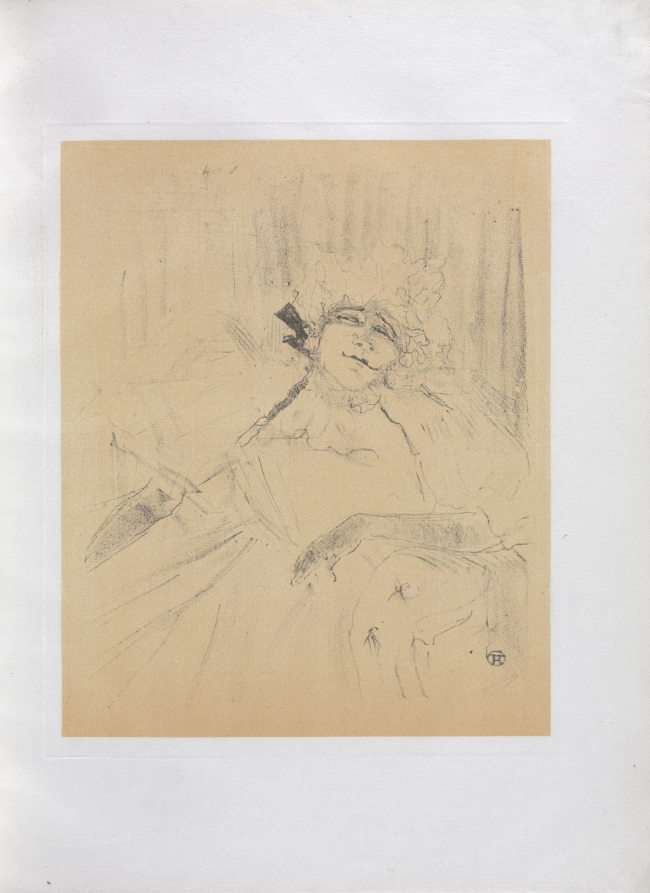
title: Yvette Guilbert-English Series: Chanson ancienne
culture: France, 19th century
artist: Henri de Toulouse-Lautrec (French, 1864–1901)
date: 1898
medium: lithograph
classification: Bound Volume